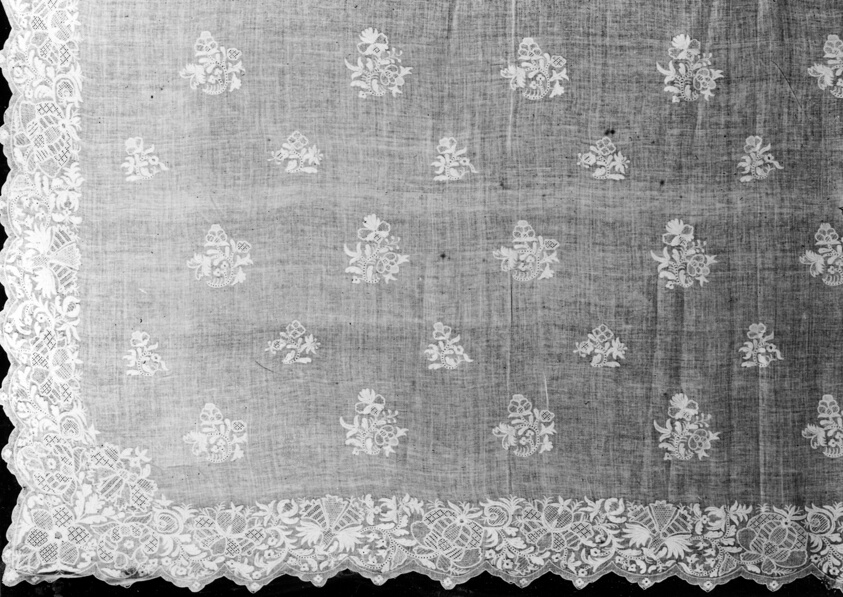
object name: Costume and Accessories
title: Apron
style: 18th Century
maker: England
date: 1760s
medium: Cotton, plain weave; drawnwork and embroidery in cotton, satin, buttonhole, chain, and double chain stitches with linen thread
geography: England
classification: textile; costume accessory; needlework (visual works); costume; dress (garment); clothing; apron (main garment); costume - embroidery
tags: flowers, floral patterns, floral, floral motifs